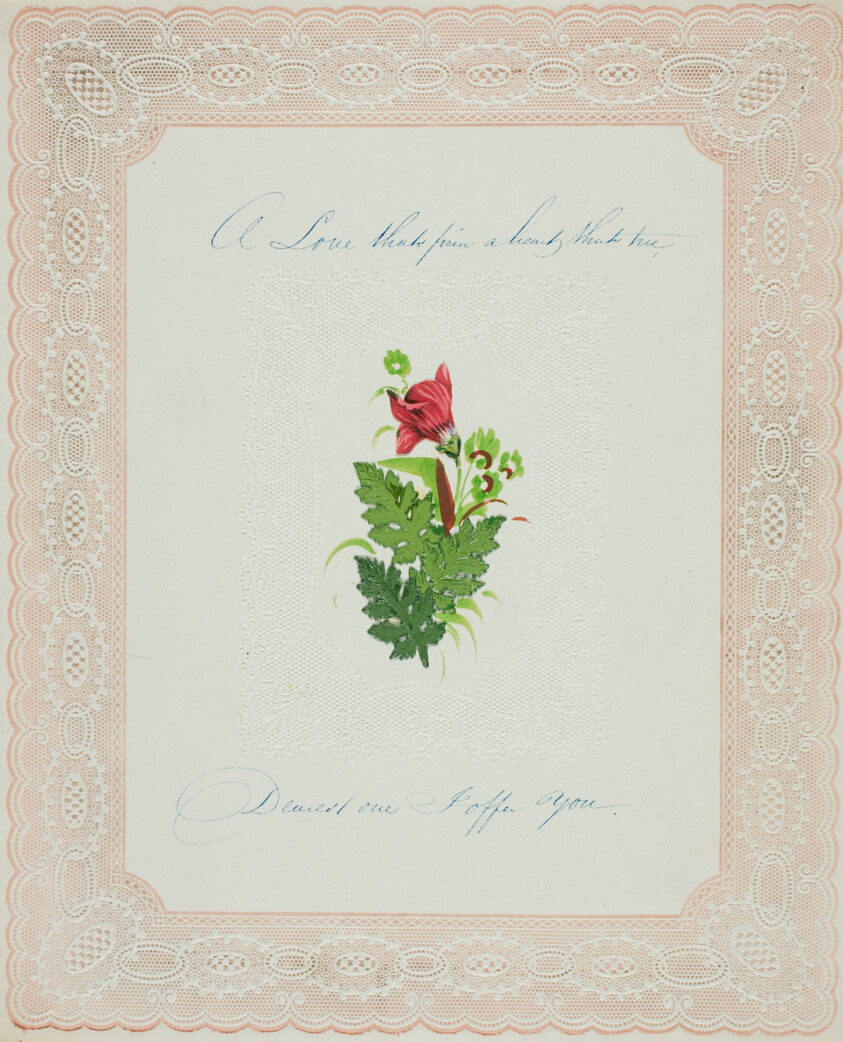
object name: Drawing and Watercolor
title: A Love's that's Firm (valentine)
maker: Unknown Artist; English, 19th century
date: c. 1850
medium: Collaged elements, with watercolor and pen and blue ink on pink accented and embossed ivory wove paper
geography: England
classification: valentine; prints and drawing; paper